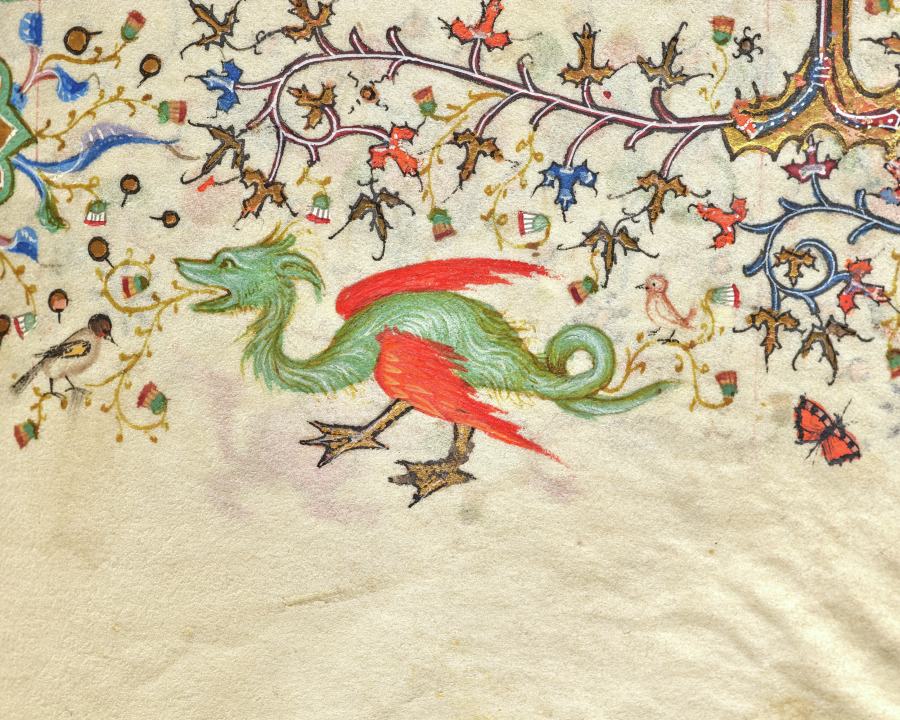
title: Hours of Charles the Noble, King of Navarre (1361-1425): fol. 281r, SS. Cosmas and Damien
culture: France, Paris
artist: Master of the Brussels Initials and Associates (French)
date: c. 1405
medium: ink, tempera, and gold on vellum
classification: Bound Volume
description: This precious volume was obviously highly prized by its owner, the French-born King of Navarre, who had his coat of arms painted on no less than twenty folios. Rather than directly commissioning this manuscript from a specific workshop, it seems that Charles the Noble acquired his book of hours -- perhaps ready-made for the luxury market -- while on a trip to Paris in 1404-05. A collaborative effort, six painting styles are evidenced within the pages of this codex, those of two Italians, two Frenchmen, and two Netherlanders. The painter who was responsible for the planning and decoration of the book, and who produced seventeen of the large miniatures, was a Bolognese artist known as the Master of the Brussels Initials. His principal assistant, responsible for most of the borders, was a Florentine who signed his name "Zecho" da Firenze on folio 208 verso.